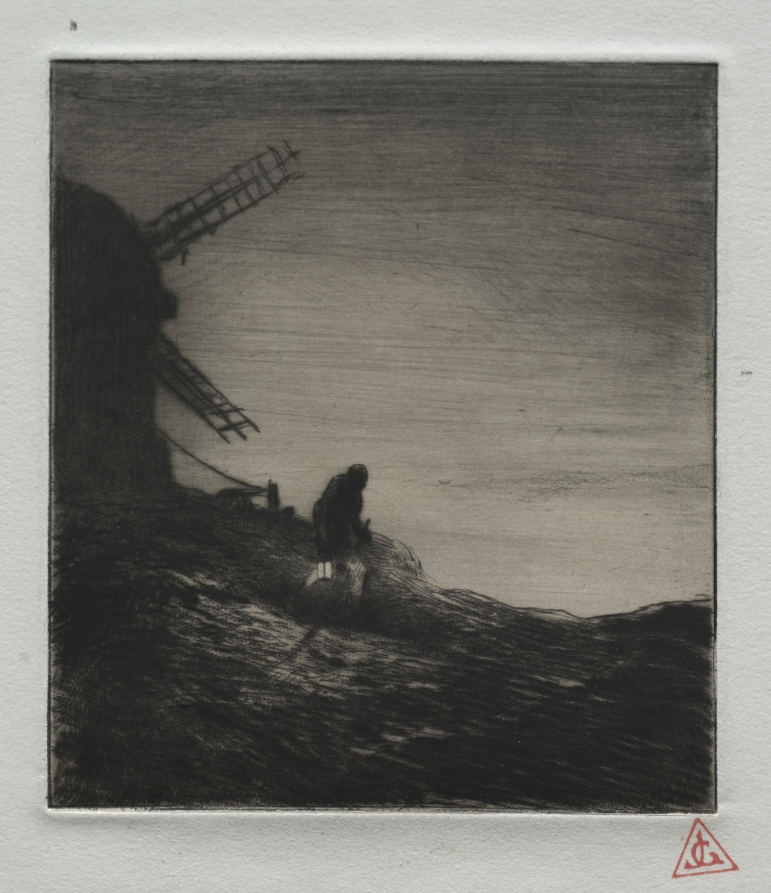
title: The Mill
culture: France, 19th century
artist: Charles-Émile Jacque (French, 1813–1894)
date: 1848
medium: etching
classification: Print